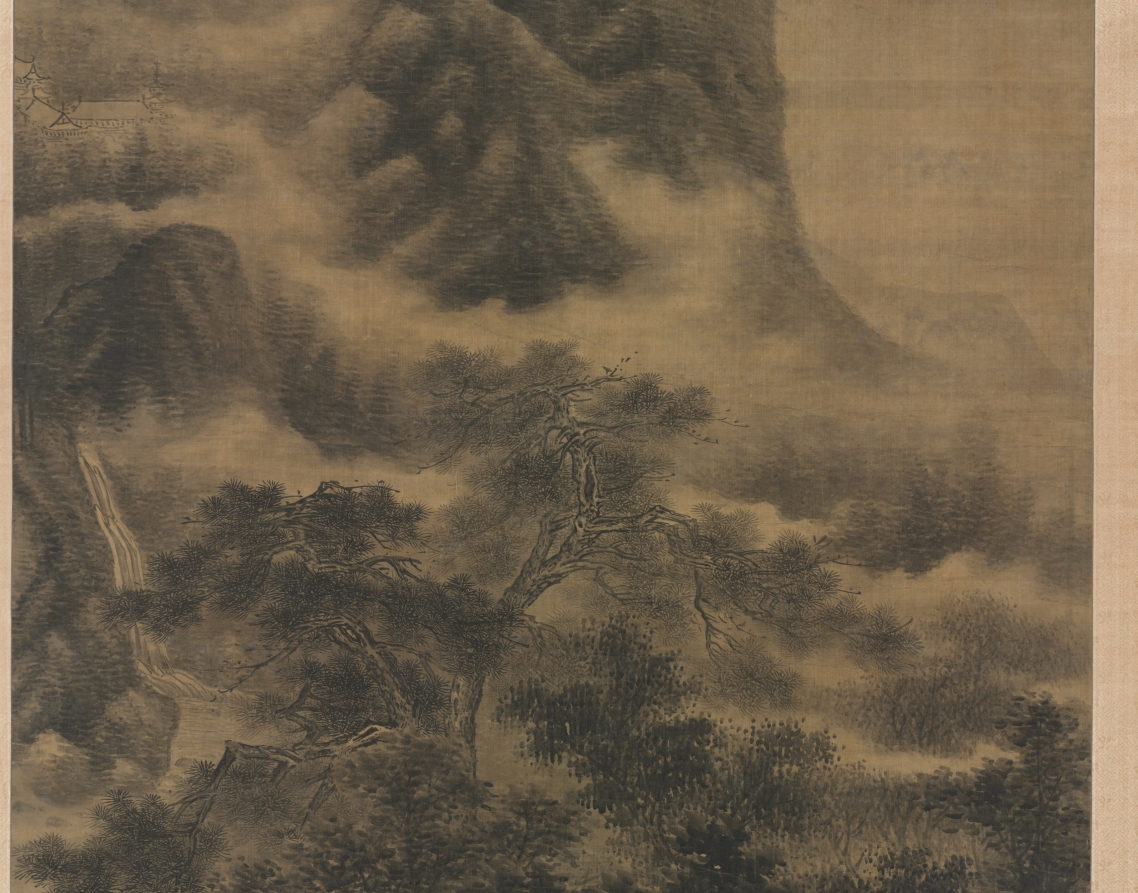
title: Clouds Visiting a Mountain Retreat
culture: China, Ming dynasty (1368–1644)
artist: Tao Hong (Chinese, active c. 1610–1640)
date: 1633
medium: Hanging scroll; ink on silk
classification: Painting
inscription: Artist's inscription, signature and two seals: Imitating Kao Fan-shan's [Kao K'o-kung's] brush at Liu-yün-ho [Valley of Lingering Clouds] during a spring day in the kuei-yu year [1633]. Yen-shan, T'ao Hung [seals] T'ao Hung chih-yin; tzu Ch'iu-shui. (Translated by Wai-Kam Ho)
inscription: 1 additional seal unidentified.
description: Little is known about Tao Hong who settled in Nanking in the latter part of his life. His son was a friend of the leading Nanjing school artist Gong Xian (on display nearby). When the Ming dynasty collapsed in 1644, Tao joined the loyalist resistance in Yunnan province. By 1645 the Manchu invaders had defeated the Yunnanese forces, prompting Tao to flee to Burma, where he died shortly thereafter. Only five of Tao Hong’s works are known to exist, of which this painting is the largest.